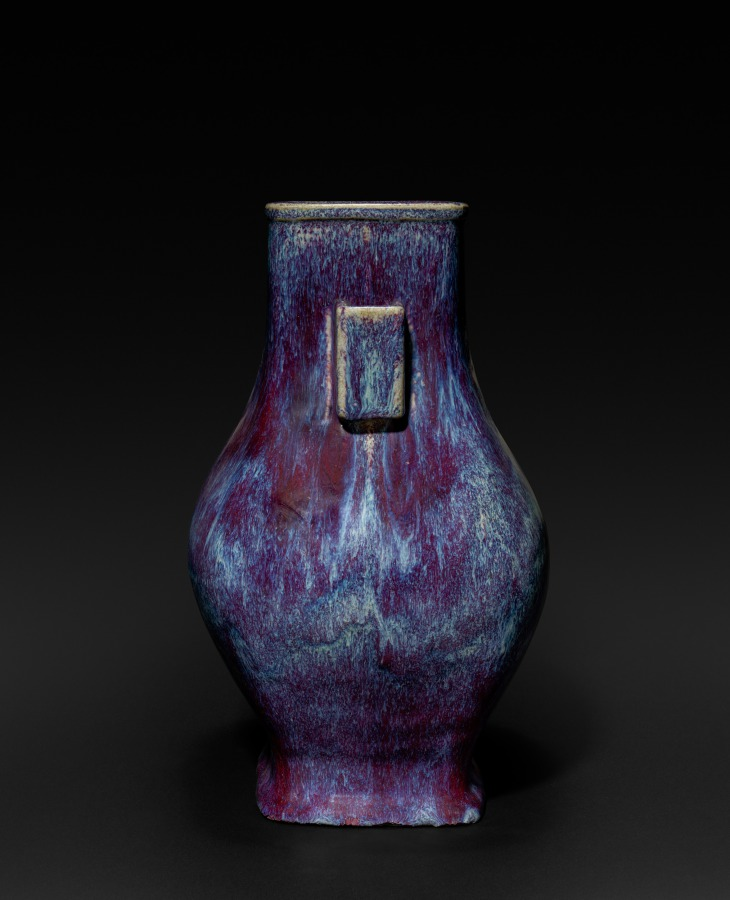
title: Flambé Vase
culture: China, Qing dynasty (1644–1911)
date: 1644–1911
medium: porcelain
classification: Ceramic